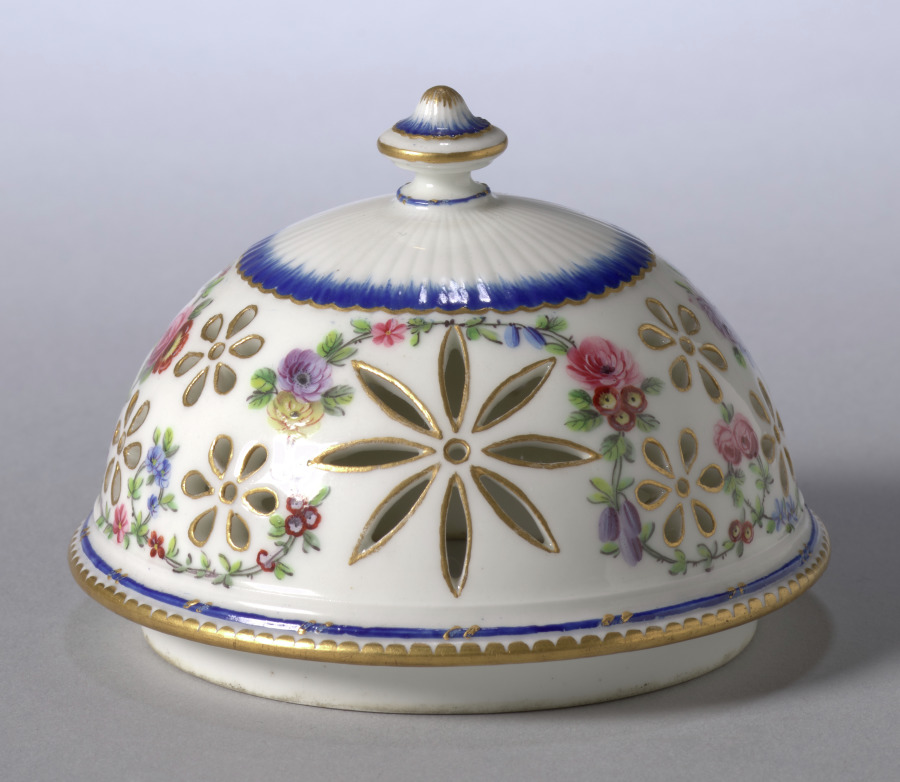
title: Sponge Box (cover)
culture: France, Sèvres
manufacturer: Sèvres Porcelain Factory (French, est. 1756)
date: c. 1769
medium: soft-paste porcelain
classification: Ceramic